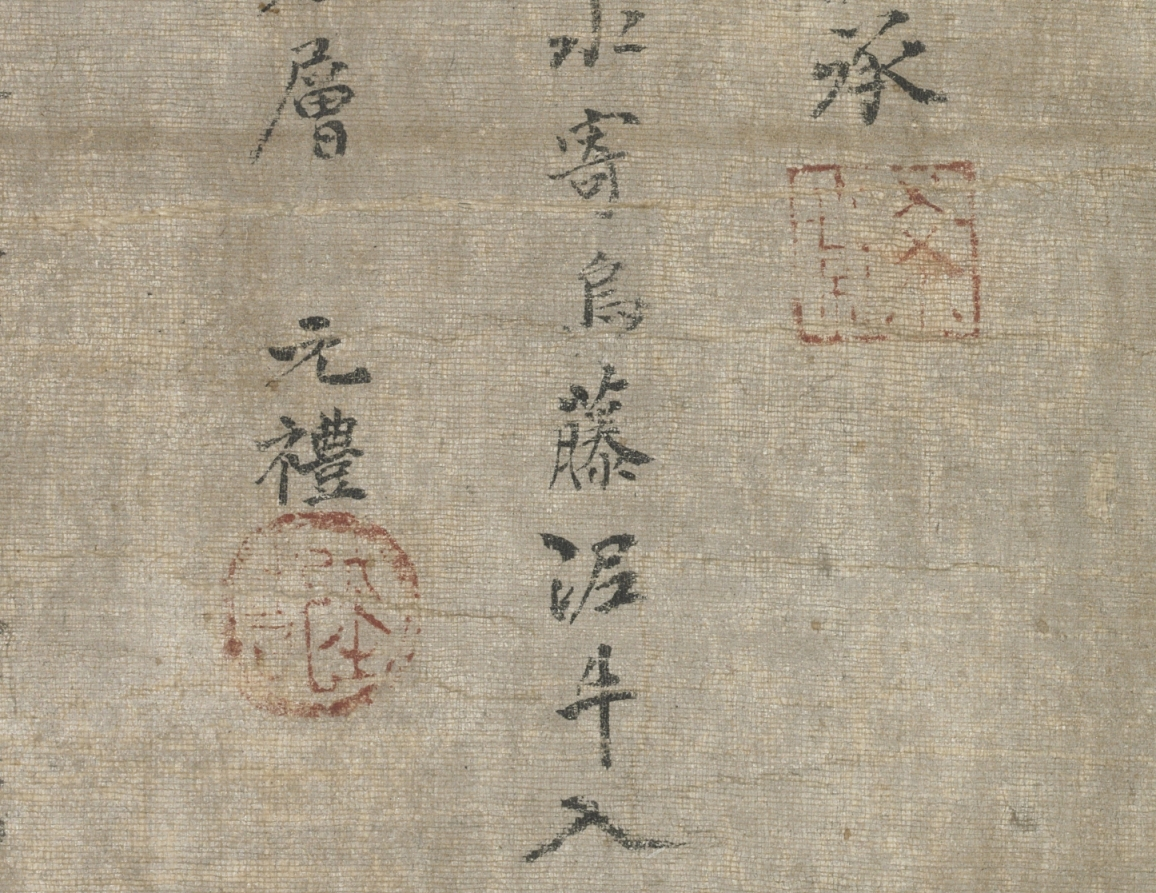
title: Landscape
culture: Japan, Edo period (1615–1868)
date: 1700s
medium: hanging scroll; ink and color on silk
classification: Painting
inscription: four inscriptions (one dated to 1414) by Japanese monks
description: This composition was fashioned after works created by Zen clerics of the Muromachi period (1392–1573), who often added their original Chinese-style poems above an ink painting to make a hanging scroll called a shigajiku. The poems here quote from essays on Sima Guang (1019–1086) by the Chinese Song dynasty literatus Su Shi (1037–1101). They interpret the studio surrounded with bamboo as a metaphor for the garden of Sima, the Song dynasty scholar-official who, in imitation of the Tang poet Bai Juyi, enjoyed the garden in isolation during his exile in Luoyang.